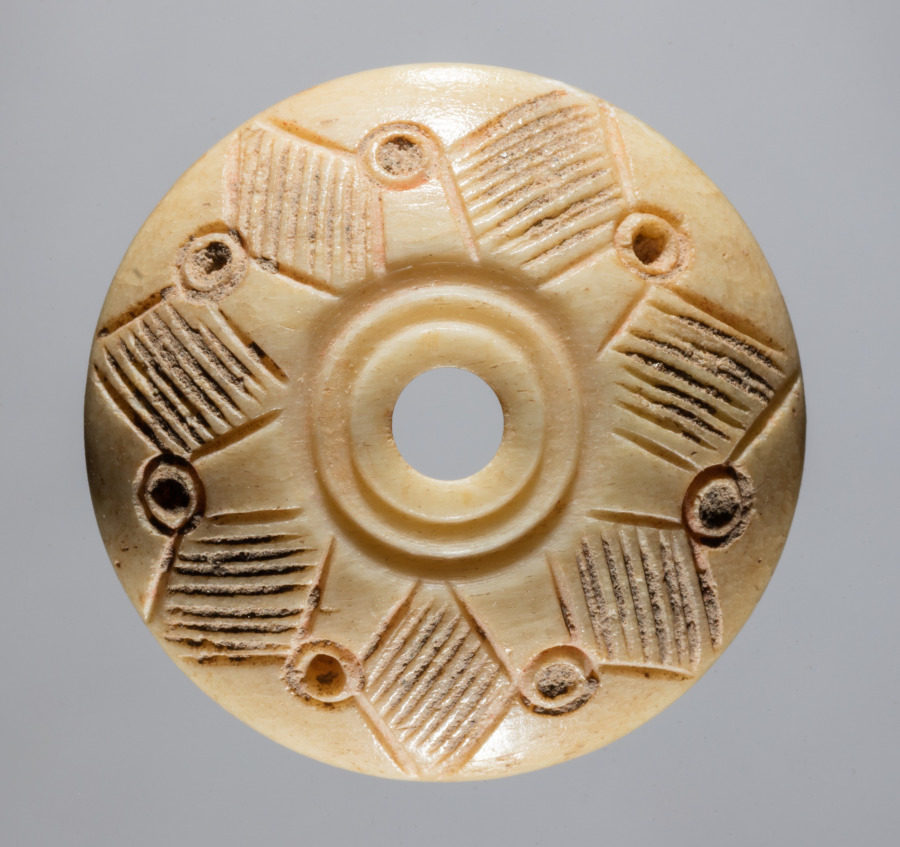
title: Spindle Whorl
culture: Iran, early Islamic period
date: 700s - 900s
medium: bone, incised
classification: Spindle Whorl